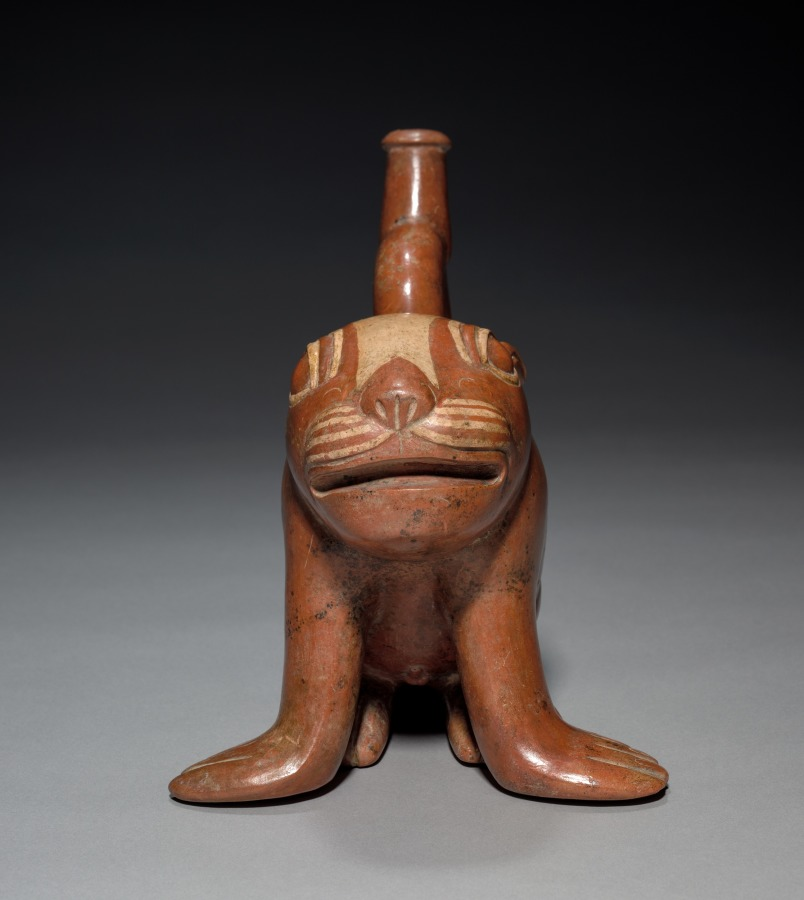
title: Sea Lion Pup Vessel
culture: Central Andes, North Coast, Moche people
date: 200–850 CE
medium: ceramic and slip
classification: Ceramic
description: Sea lions commonly appear in Moche art as effigy vessels, like this appealing pup, or in complex scenes that often show them as the targets of human hunters. They may have been prized in part for the beach pebbles found in their stomachs; modern Peruvian folk healers consider such pebbles to have powerful medicinal qualities. Also, colonial-period natives believed that sea lions carried the dead to off-shore islands, an idea that could date to Moche times.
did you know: Moche potters were skilled at producing charming images using only red and white slip.